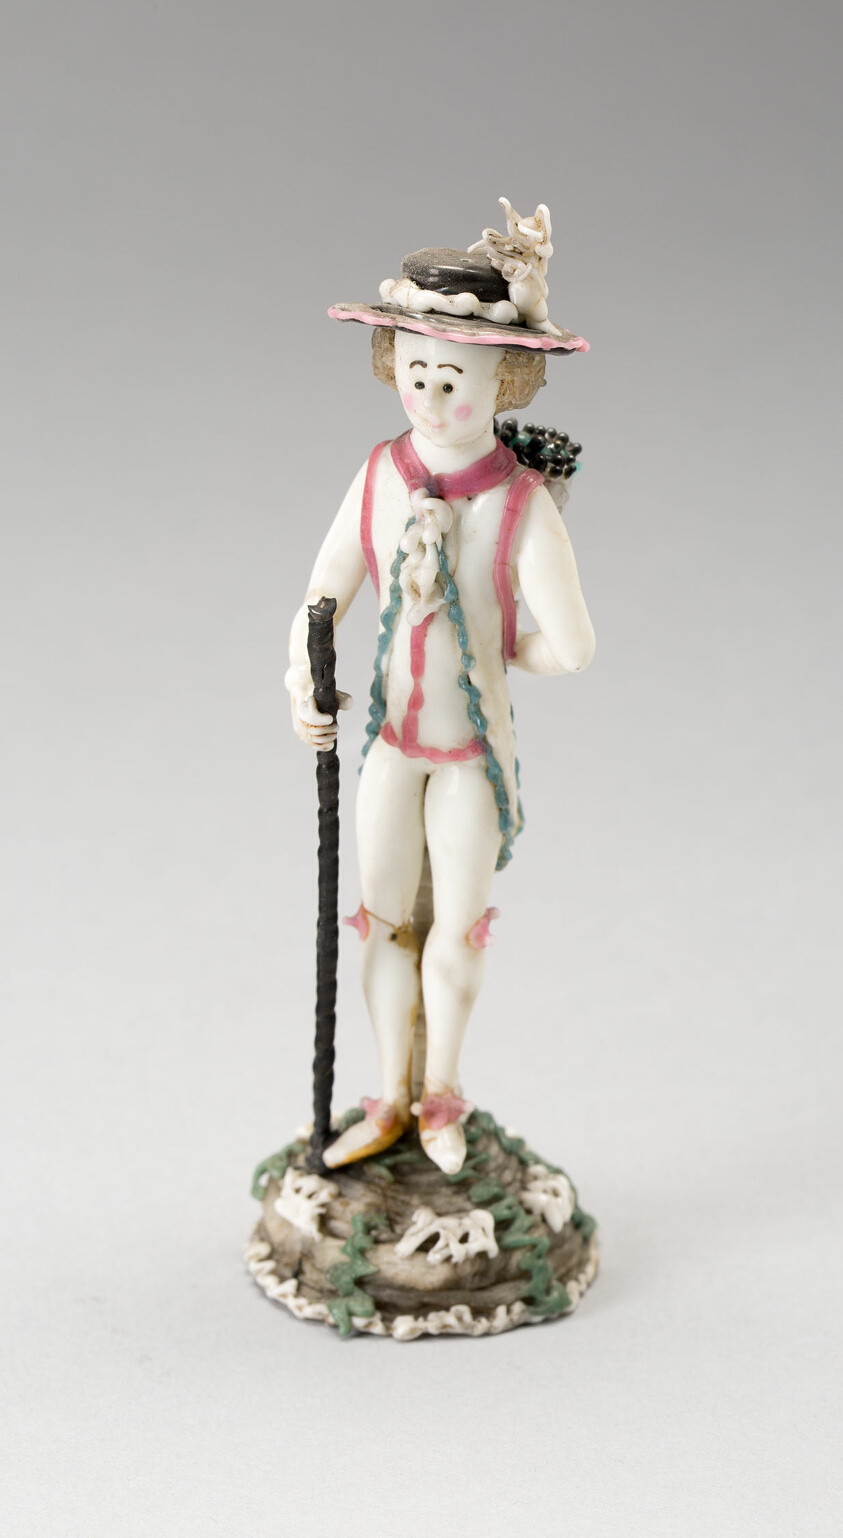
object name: Glass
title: Man with Staff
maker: Nevers, France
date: 1750/99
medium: Glass; lampwork (verre de Nevers), metal armature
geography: France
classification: glass; miniature; decorative object/ornament; european decorative arts